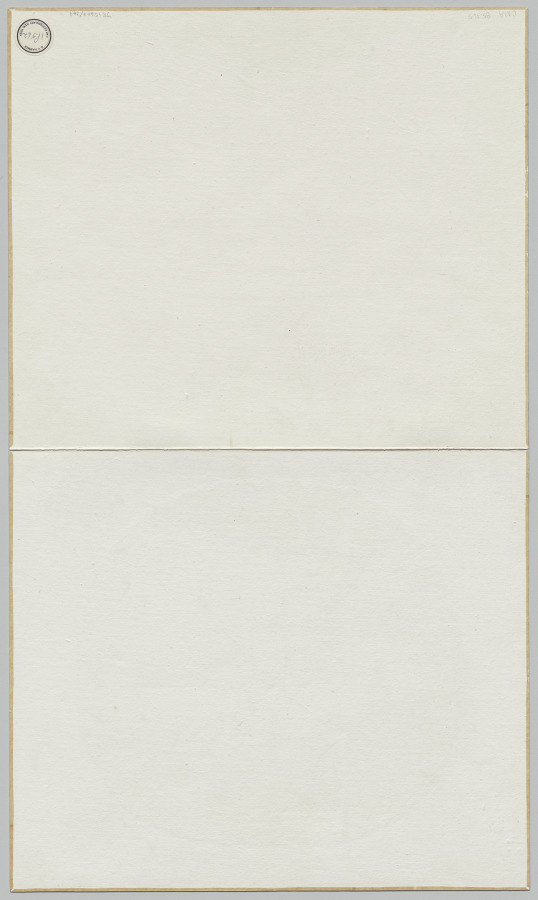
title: Willows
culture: China, Southern Song dynasty (1127–1279)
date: 1100s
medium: album leaf; ink and light color on silk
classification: Painting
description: A single scholar in a skiff drifts beneath shade-giving willows and savors his view of mountain peaks just emerging from the pervasive river mist. Round lotus leaves and vertical marsh reeds join with the dotted grasses and curving willow leaves to provide considerable textural variety within the foreground area, which contrasts with the more irregular texturing of the distant mountains. Misty space plays an active part in the composition, and the components of the painting are organized around bisecting diagonals.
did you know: This river scene features low-lying spits of land surrounded by lotuses and bands of mist floating amid overhanging willows.